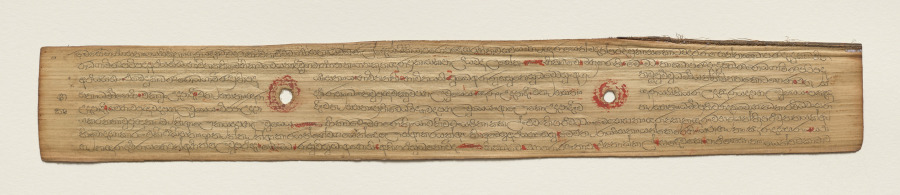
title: Leaf from a Buddhist Manuscript (recto)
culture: Sri Lanka, Singhalese, Late 17th century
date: c. 1700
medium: fiber paper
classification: Manuscript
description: Palm leaf material is still used for manuscripts in Sri Lanka. The palm leaves are prepared first by boiling them, drying them in the sun, and then rubbing them with oils. Scribes then use a metal stylus to incise the text. Then charcoal powder is wiped across the pages, filling in only the inscribed lines.